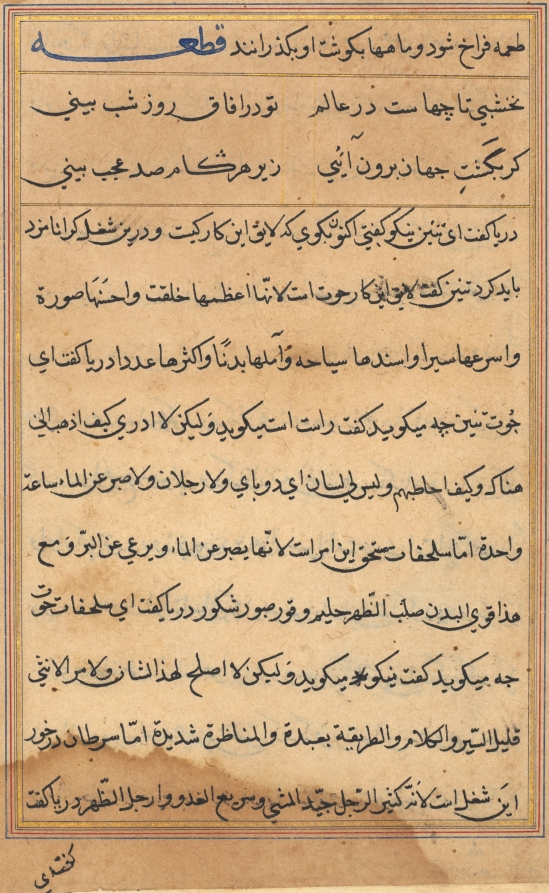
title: Page from Tales of a Parrot (Tuti-nama): text page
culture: Mughal India, court of Akbar (reigned 1556–1605)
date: c. 1560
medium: gum tempera, ink, and gold on paper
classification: Painting